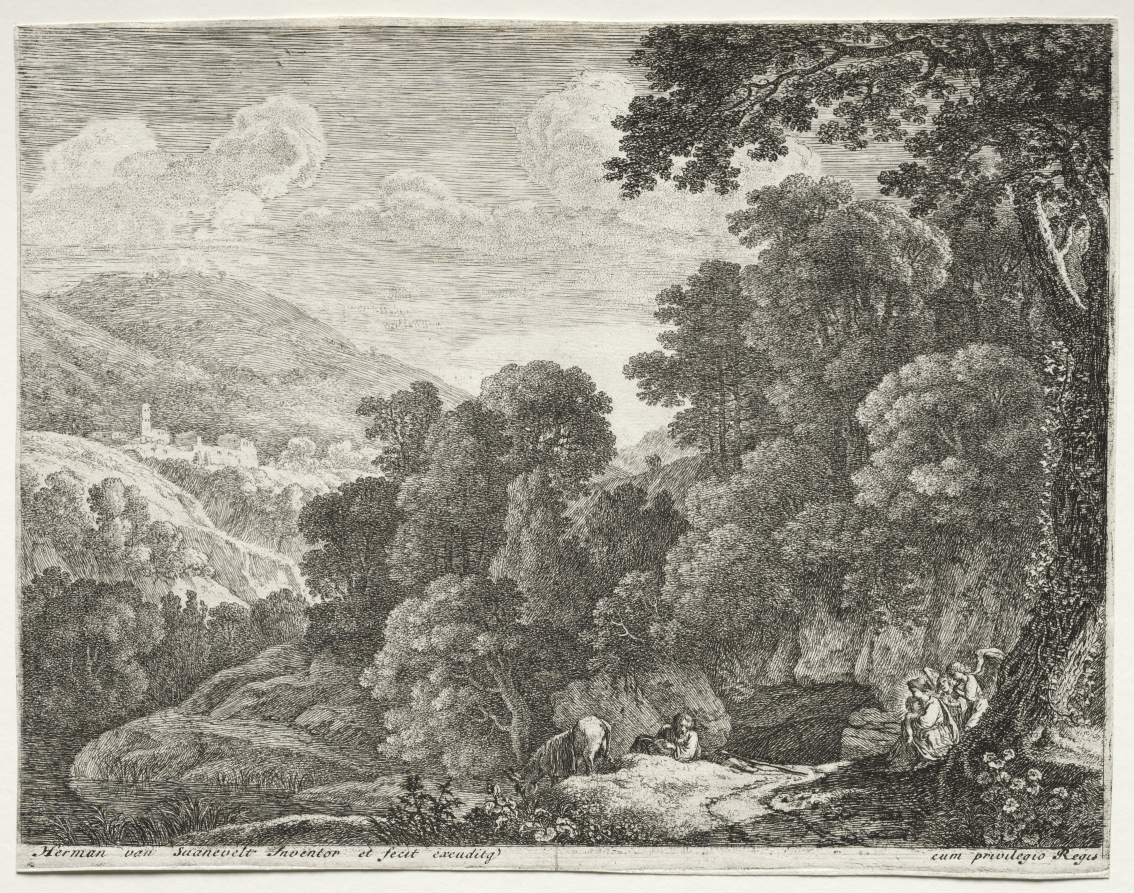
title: The Cave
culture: Netherlands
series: The Flight into Egypt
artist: Herman van Swanevelt (Dutch, c. 1600–1655)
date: c. 1652–54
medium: etching and engraving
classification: Print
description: This series by Herman Swanevelt, The Flight into Egypt, illustrates an event from the New Testament of the Bible. Joseph, Mary, and Christ fled into Egypt to escape King Herod's persecution. Traditionally represented as a single image, Swanevelt enlarged the story into four scenes. The Holy family is first shown traveling with three angels behind them, then Joseph helps Mary off the donkey, next Joseph leads the donkey to water as Mary changes the child, and finally the family is at rest. However, the main focus of each of these prints is the depiction of landscape, a genre that reached unprecedented levels of popularity during the 1600s. The scenery, looking much more like the Italian countryside than Egypt, was inspired by Swanevelt's paintings. Although he was Dutch, he spent most of his career in Paris and Rome. As a painter, he was known for his ability to convey warm, glowing sunlight, a quality also found in his etchings.